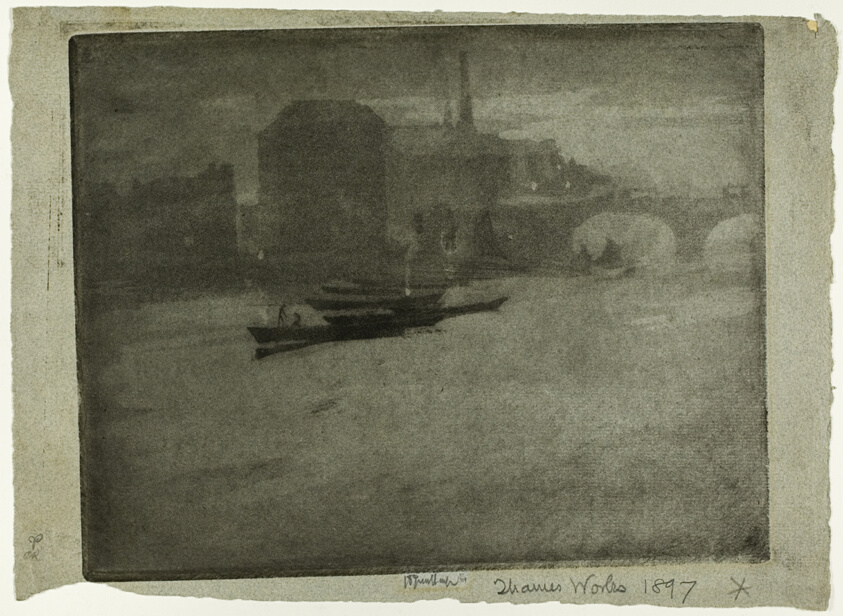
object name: Print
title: Mist on the Thames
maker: Joseph Pennell (American, 1857-1926)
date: 1903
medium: Aquatint on gray laid paper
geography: United States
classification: aquatint; print; prints and drawing